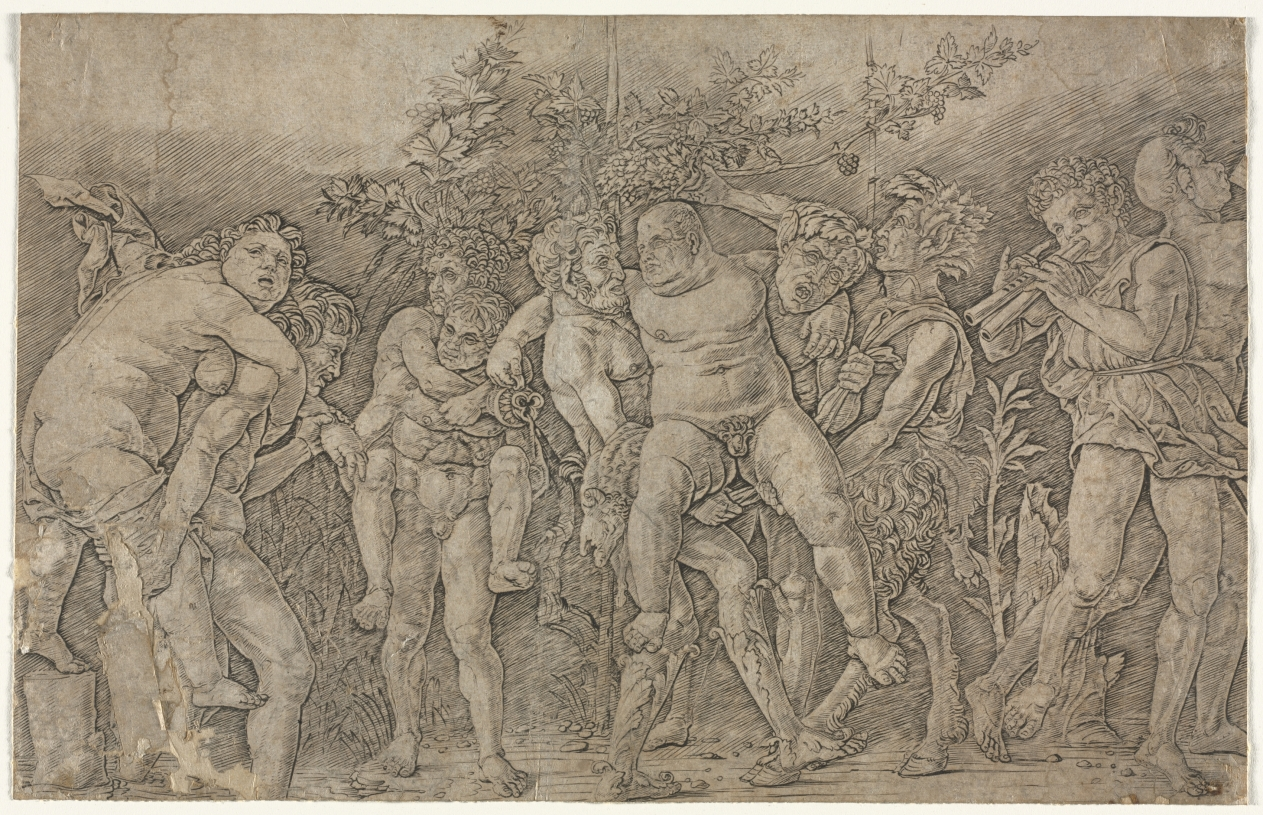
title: Bacchanal with Silenus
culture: Italy, 15th century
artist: Andrea Mantegna (Italian, about 1431–1506)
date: 1481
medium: engraving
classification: Print